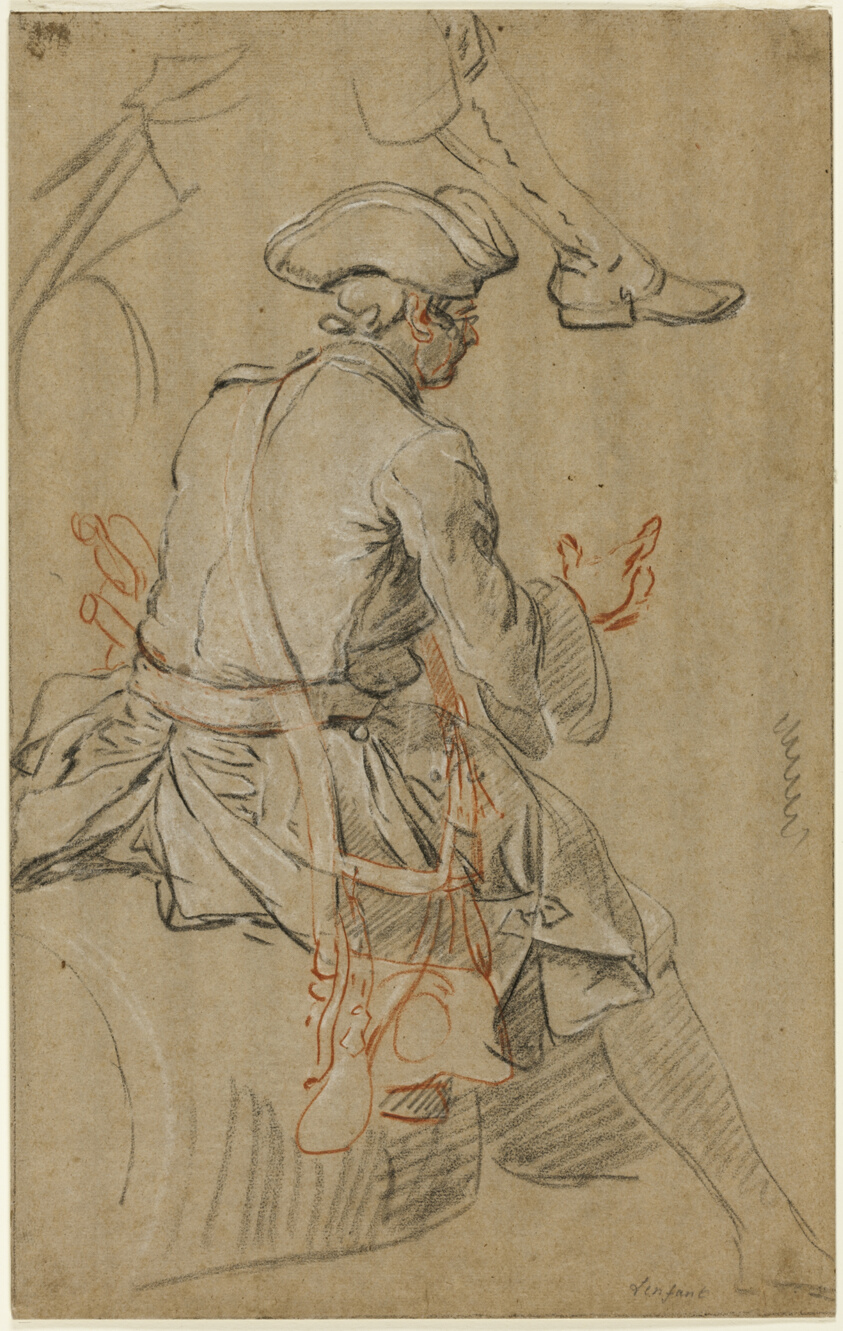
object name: Drawing and Watercolor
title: Sketch of Man on Horseback, with Separate Sketch of his Right Foot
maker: Pierre Lenfant (French, 1704-1787)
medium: Black crayon, with red chalk and touches of black chalk, heightened with white chalk, on dark tan laid paper, laid down on ivory wove paper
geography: France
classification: chalk; drawings (visual works); prints and drawing